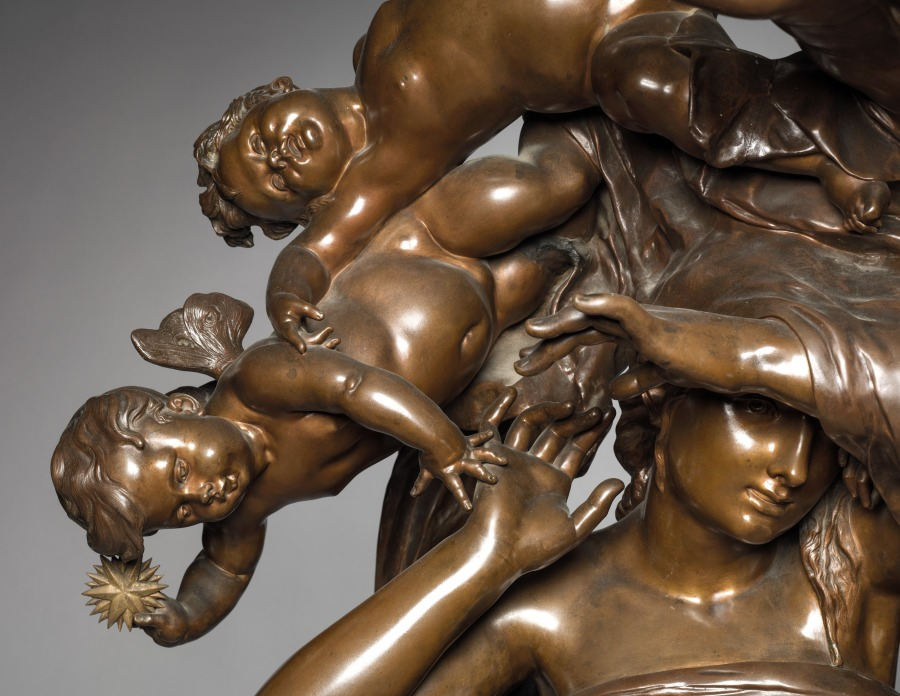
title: Dawn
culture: France, 19th century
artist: Gustave-Joseph Chéret (French, 1838–1894)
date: c. 1883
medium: bronze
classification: Sculpture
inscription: signed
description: This sculpture is of the same design as one exhibited by Chéret at the Paris Salon of 1883.